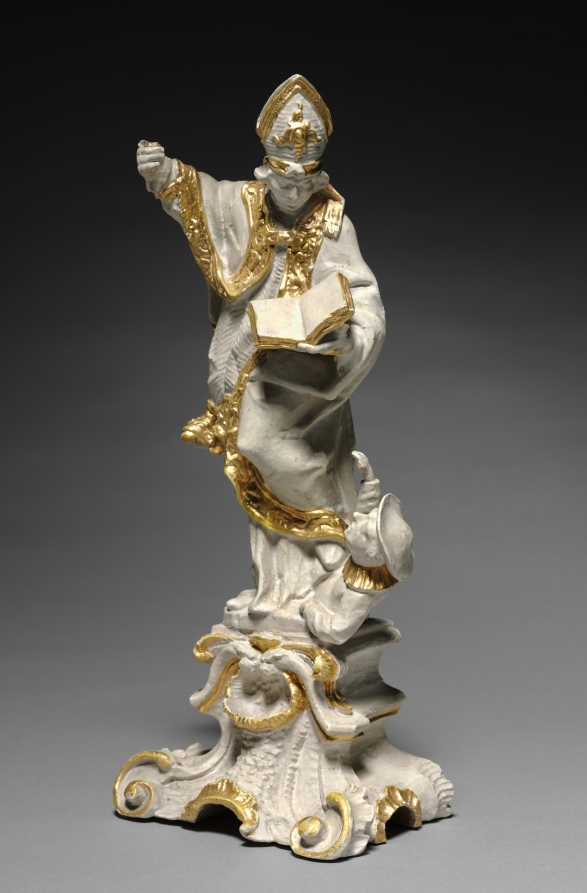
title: Bishop Saint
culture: Germany, 18th century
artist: attributed to Ferdinand Tietz (Austrian, 1708–1777)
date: c. 1740–1750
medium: painted and gilded wood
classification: Sculpture